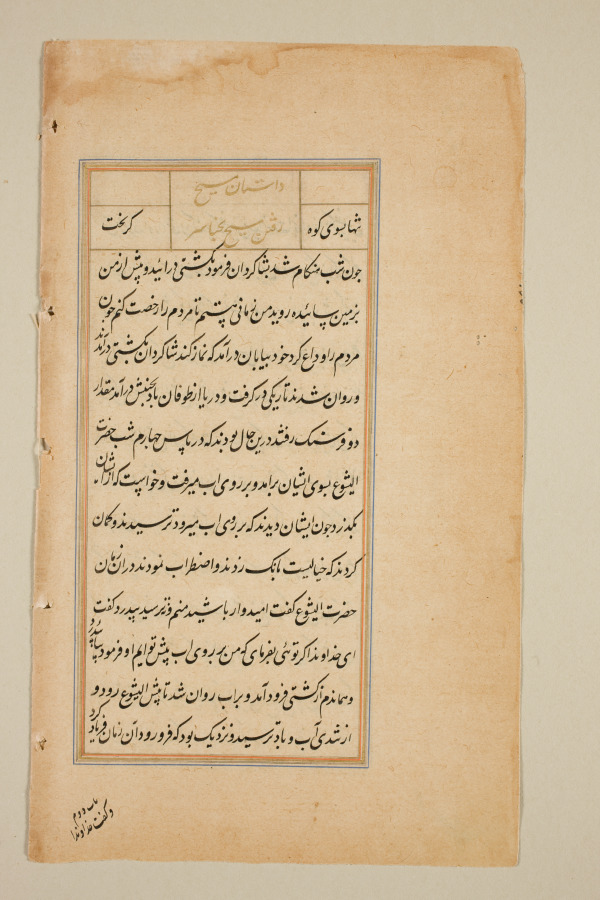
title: Text page from a Mirror of Holiness (Mir’at al-quds) of Father Jerome Xavier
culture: Mughal India, Allahabad, made for Prince Salim (1569–1627)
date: 1602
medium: Ink and gold on paper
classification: Manuscript